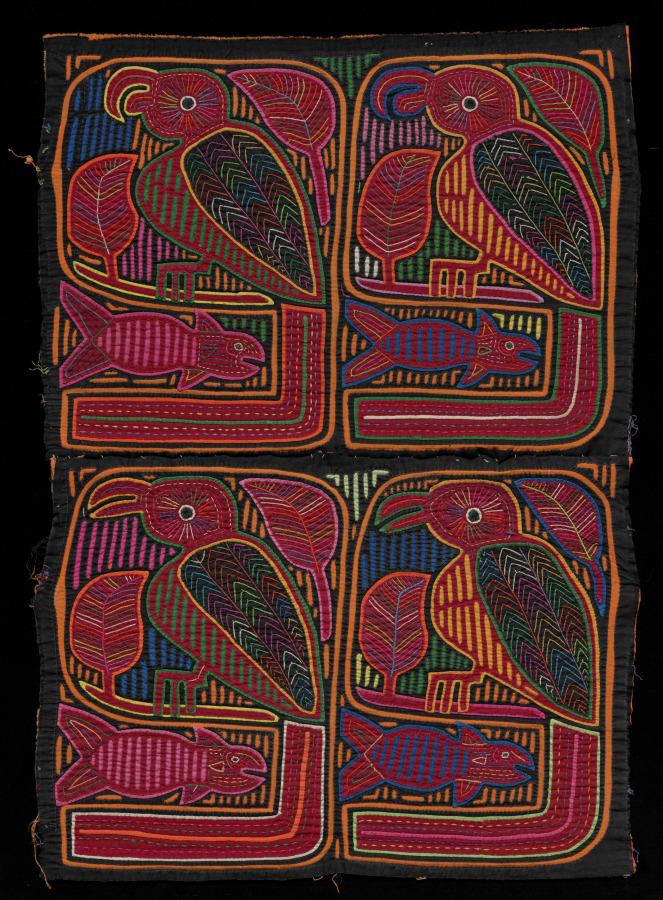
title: Birds and Fish Mola Panels (Pair)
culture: Republic of Panamá, Gunayala Comarca, Guna people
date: 1900s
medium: Cotton; reverse appliqué, appliqué, embroidery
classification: Garment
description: These two, nearly identical panels were created by a female artist of the Guna, an Indigenous people of the Republic of Panamá. Originally, they were stitched into the front or back of a blouse (mola). Such blouses are so distinctive to the Guna that they are the single most recognizable element of Guna cultural identity.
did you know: Such panels originally were sewn into blouses known as molas.